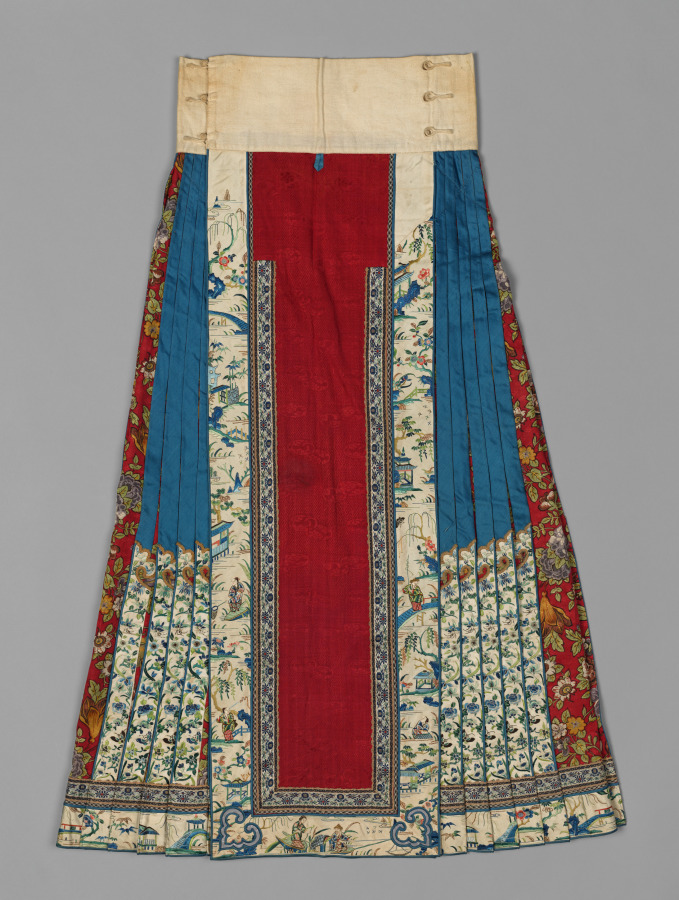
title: Skirt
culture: China, Qing dynasty (1644-1911)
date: 1800s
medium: Silk, cotton: embroidery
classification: Garment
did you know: This skirt includes both embroidered sections and polychrome printed fabric.